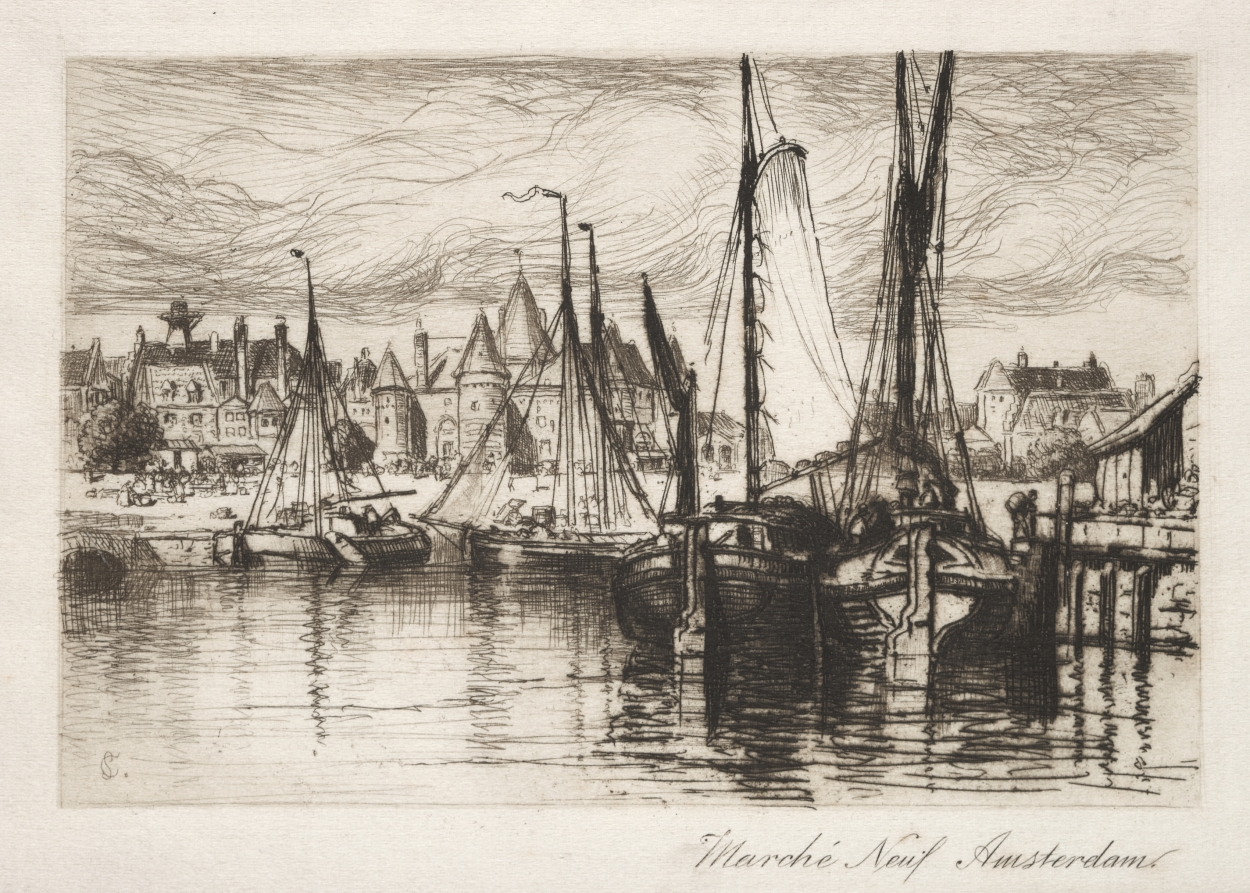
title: The New Market, Amsterdam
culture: America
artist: Samuel Colman (American, 1832–1920)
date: c. 1860–90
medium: etching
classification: Print